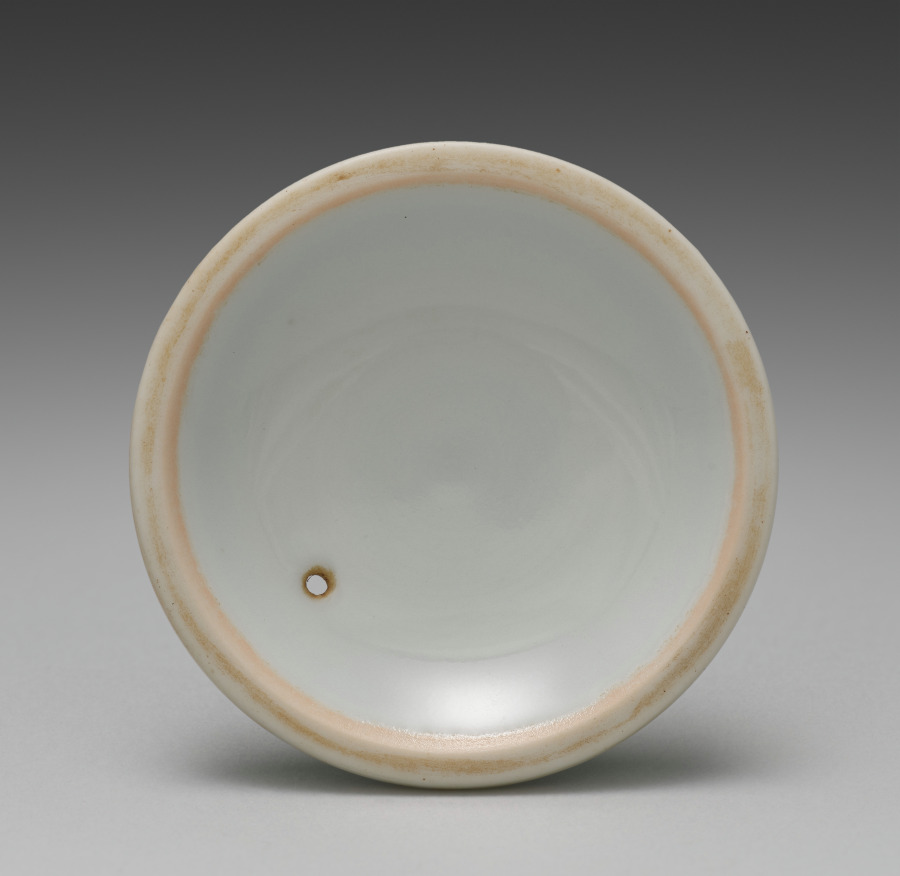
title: Lid for Teapot with Begonias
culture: Japan, Meiji period (1868–1912)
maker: Seifū Yohei III (Japanese, 1851–1914)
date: 1897–1914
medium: Porcelain with underglaze and overglaze colors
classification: Ceramic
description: This teapot has complex surface treatment: a design of begonias in modulated underglaze blue for the leaves and stems as well as thick overglaze white with incised lines to define the petals, plus small areas of underglaze yellow at their low-relief centers. A band of underglaze blue gives further definition to the lid’s handle, and the area just above the base has a double band of blue above a row of snail-shell curls. Unlike many other teapots, which have marks on their bases, this one has “Seifu” incised into one of its sides in relatively large characters. It is the side that would face the host if the teapot were held by the handle with the right hand, which would be the expectation.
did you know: This teapot with begonias combines underglaze blue with subtle use of yellow and white enamels.